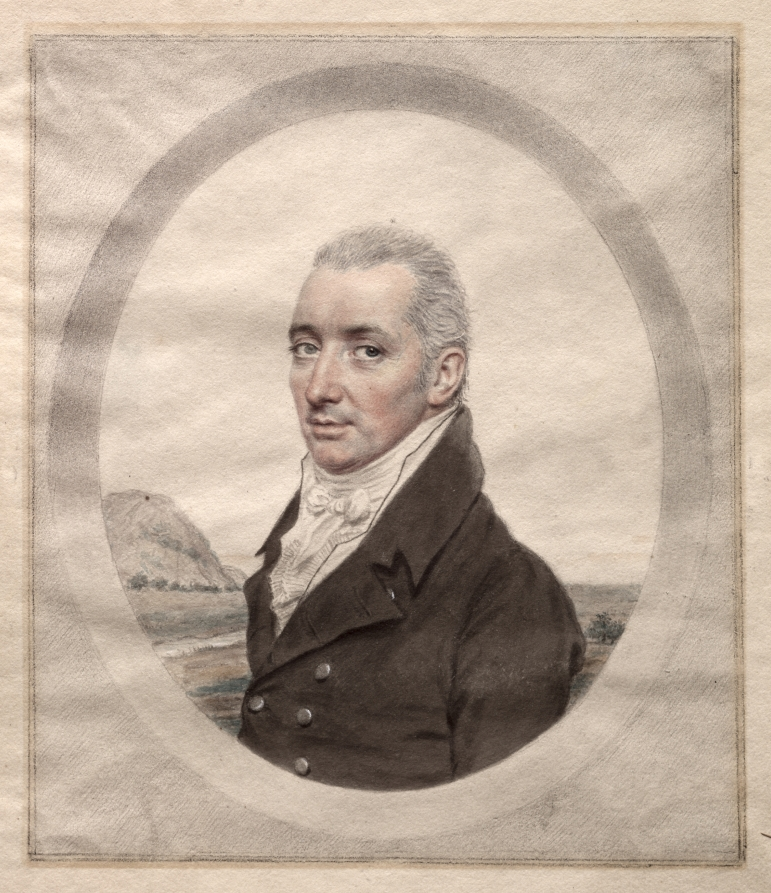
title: Portrait of General Keith MacAlister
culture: England, 18th century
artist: John I Smart (British, 1741–1811)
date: c. 1800–1810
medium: watercolor and graphite, heightened with traces of white gouache, on paper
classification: Portrait Miniature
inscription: across bottom, in graphite: Genl Macalester ; VERSO, center, in graphite: 169; lower left, in graphite: l. 159. [circled]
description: Although it is impossible to say if it was always part of the artist’s process to execute a preparatory sketch prior to painting each miniature, we do know that John Smart retained many hundreds of these sketches. A great number were inherited by his son John James Smart, who in turn left them to his daughter Mary Ann Bose. Upon her death in 1934, they were divided between three of her children: William Henry Bose, Lilian Dyer, and Mabel Annie Busteed. General MacAlister is represented in three-quarter view, bust length, and facing the right. His eyes are blue, but the right eye is clouded and lighter in color than the left. There is no sign of isolated damage or fading, confirming that this color difference was among MacAlister’s physical attributes. He wears a brown coat; white, frilled vest edged in black; tall collar; and a white cravat tied in a bow. His closely cropped hair is powdered, and an unidentified rocky landscape through which a small river runs is painted in the background; it probably represents a place of personal significance in Scotland or India, possibly even Seringapatam and the Cauvery River. Smart depicted MacAlister inside of a penciled oval tromp l’oeil frame. The drawing is replete with physically informative details and is larger and more finished than drawings intended to function exclusively as preparatory sketches, though it may also have served this purpose. Beneath the elaborate penciled border is written in large graphite script “Genl Macalester.” This inscription is not in the artist’s hand and almost certainly a later addition. A Colnaghi label was removed from the verso after the work entered the museum’s collection. The sitter is likely Major-General Keith MacAlister (1746–1820) of the Madras Cavalry. He was the eldest of three soldier brothers who served with distinction in India. MacAlister was born at Skerrinish in the Isle of Skye and ascended through the ranks rapidly following his appointment as cadet in 1777. He became captain in 1796; lieutenant-colonel in 1799; colonel in 1809; and major-general in 1812. He is celebrated particularly for his role in the 1799 storming and capture of Seringapatam, a decisive battleground in the Fourth Anglo-Mysore War, and for rescuing his brother Matthew from a long imprisonment in the same city. MacAlister was also instrumental in organizing the Madras Light Cavalry.5 Smart’s portrait of MacAlister would have been painted between 1800 and 1810, when the sitter was an older man and had returned to England before settling in Scotland. The Nelson-Atkins Museum of Art owns a Smart portrait on ivory called Keith Michael Alexander, dated 1810. Although he wears a military uniform rather than civilian clothes, the sitter is identical to the one in the Cleveland drawing—note in particular the differently colored eyes and the blue veins at the left temple. Although it was painted in 1810, possibly some years after the Cleveland sketch, the sitter’s hair loss is more pronounced in the earlier drawing. This inconsistency can be explained by the fact that Regency fashion called for men to comb their hair forward, thereby obscuring baldness, as seen here. Otherwise, the portraits are so similar that it is likely that Smart was consulting the earlier finished drawing when executing the 1810 miniature in ivory. Both “General Macalister” and “Colonel Keith Michael Alexander” are listed by Daphne Foskett among Smart’s sitters, but she reproduces images only of the latter Nelson-Atkins miniature. No additional portraits of the period depicting gentlemen of either name have been discovered at this time. The Nelson-Atkins ivory has been called Keith Michael Alexander by tradition at least since it was in the Mr. and Mrs. John W. Starr collection before entering the museum in 1958. However, the miniature has not been removed from the frame since its acquisition, and there is no evidence of an inscription. It is likely that Keith Michael Alexander is a mistaken interpretation of the name Keith MacAlister, particularly because no record of a soldier by the name of Keith Michael Alexander has been discovered.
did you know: Sketches helped John Smart work out the particulars of a portrait before commencing the miniature on ivory; they were useful in the event that a duplicate might later be required.